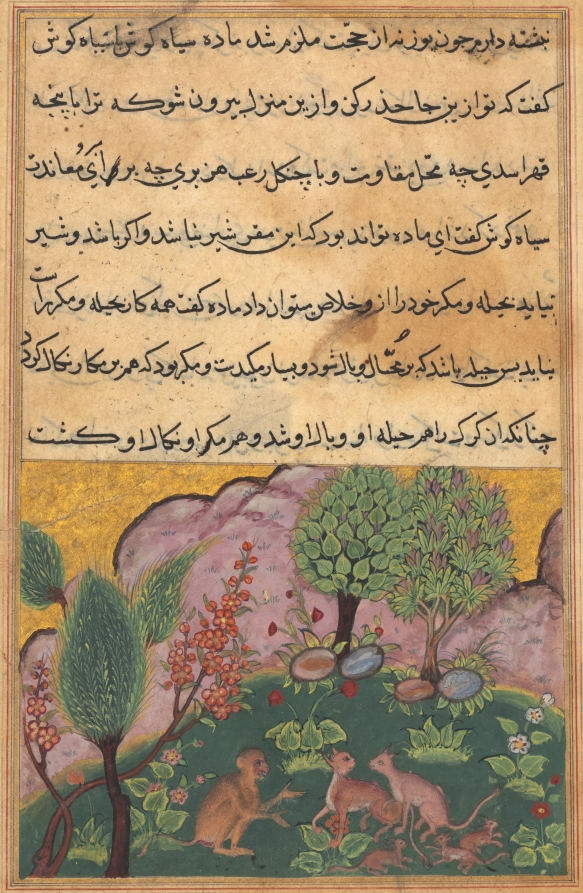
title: The monkey, serving as the lion’s chamberlain, converses with the lynx and its mate who have arrived with their cubs to settle in the lion’s domain, from a Tuti-nama (Tales of a Parrot): Twenty-ninth Night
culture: Mughal India, court of Akbar (reigned 1556–1605)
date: c. 1560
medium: gum tempera, ink, and gold on paper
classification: Painting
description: While the lion is away, the monkey is put in charge of protecting his land. However, a family of lynx soon move into the lion’s den, claiming that they are the rightful owners. The text depicts the lion’s home as a beautiful meadow with a field of tulips.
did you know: The artist has faithfully rendered the distinctive tufts on the ears of all five lynxes.